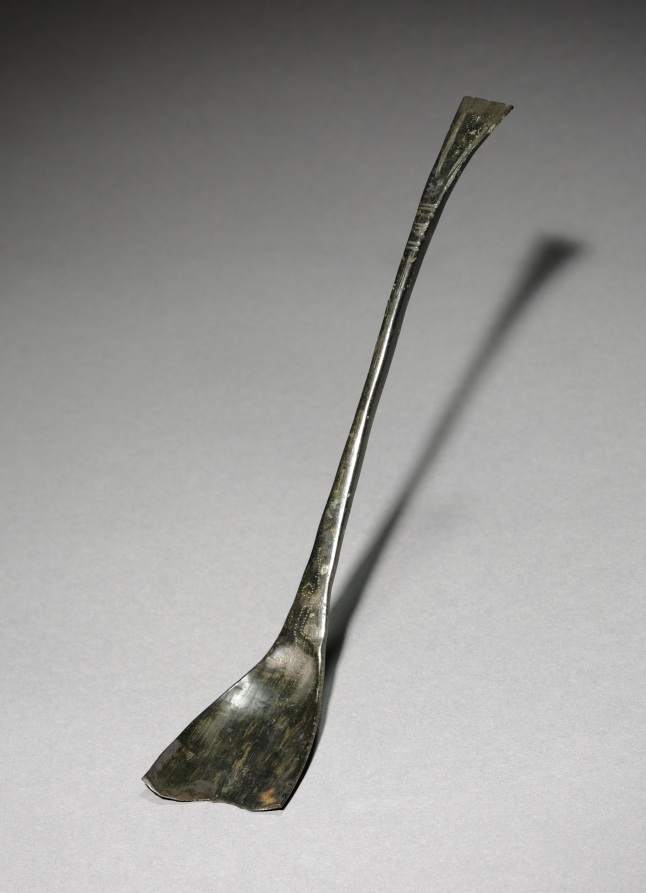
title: Spoon with Fish-Tail Design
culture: Korea, Goryeo dynasty (918–1392)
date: 918–1392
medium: silver bronze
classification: Metalwork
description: Many of Goryeo period spoons like this one feature a curved handle that splits into a jagged fishtail design. This fishtail design is not unique to Korea; it was also widely used in the area under the rule of two non-Han Chinese states: Liao (907–1125) and Jin (1115–1234). These seemingly ordinary objects testify to exciting material interactions between the Goryeo dynasty and non-Han Chinese northern states, which were often omitted from the official records.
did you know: Bronze spoons are the most common burial item. Scholars have proposed that toward the end of the 14th century, Koreans enjoyed meat-based soups more than any other dishes, explaining why spoons became common household items as well as burial goods.